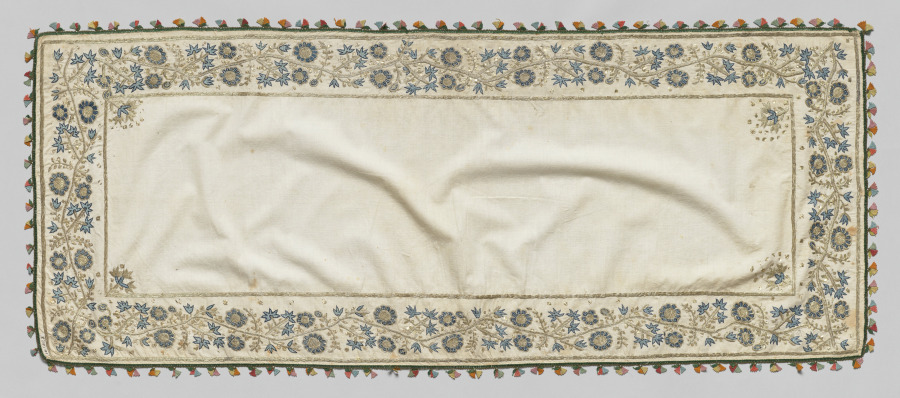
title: Garment or furnishing textile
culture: Africa, North Africa, Tunisia, Tunisian embroiderer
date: early 1900s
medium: Linen, silk, metal, dye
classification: Embroidery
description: Artistic trends and fashions circulated widely during the late 1800s and early 1900s. The embroidered floral borders and delicate trim on this woven linen textile resembles those made across the Ottoman Empire's territories in the eastern Mediterranean. At this time, Tunisia was ruled by the Husaynid dynasty, which was loosely affiliated with the Ottoman court.